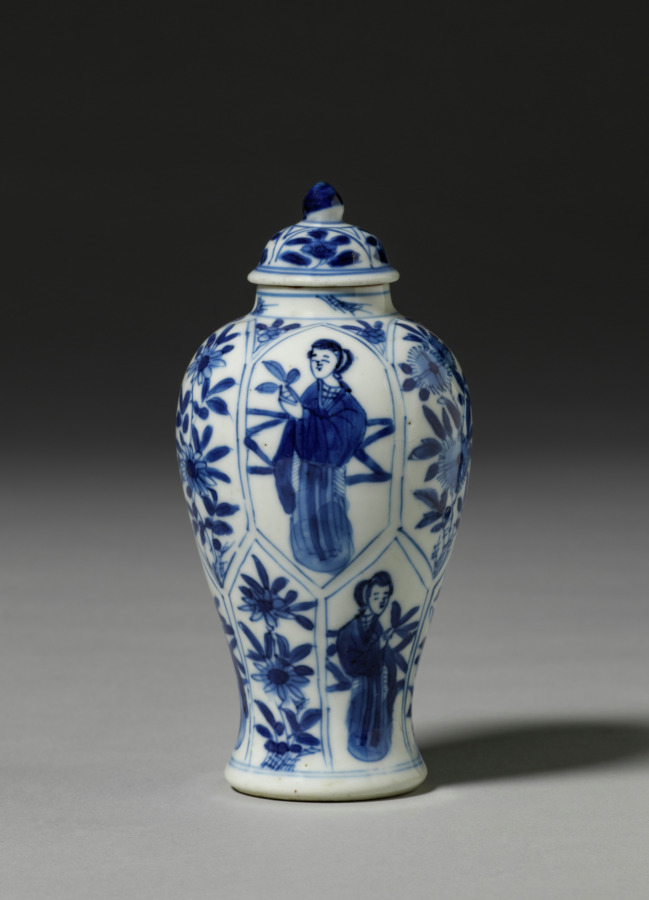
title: Jar with Cover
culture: China, Qing dynasty (1644-1911)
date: 19th Century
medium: porcelain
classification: Ceramic